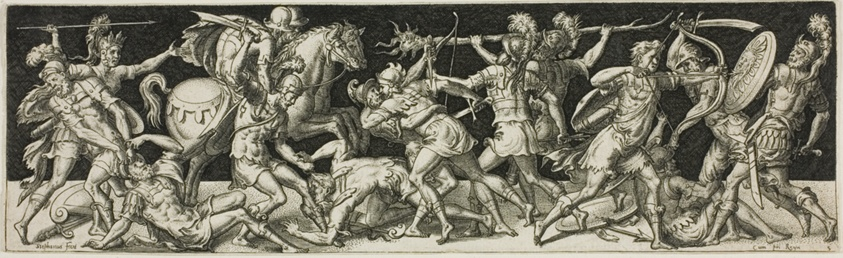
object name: Print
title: Combats and Triumphs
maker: Etienne Delaune; French, c. 1519-1583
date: 1550/1572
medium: Engraving on paper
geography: France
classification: engraving; print; prints and drawing